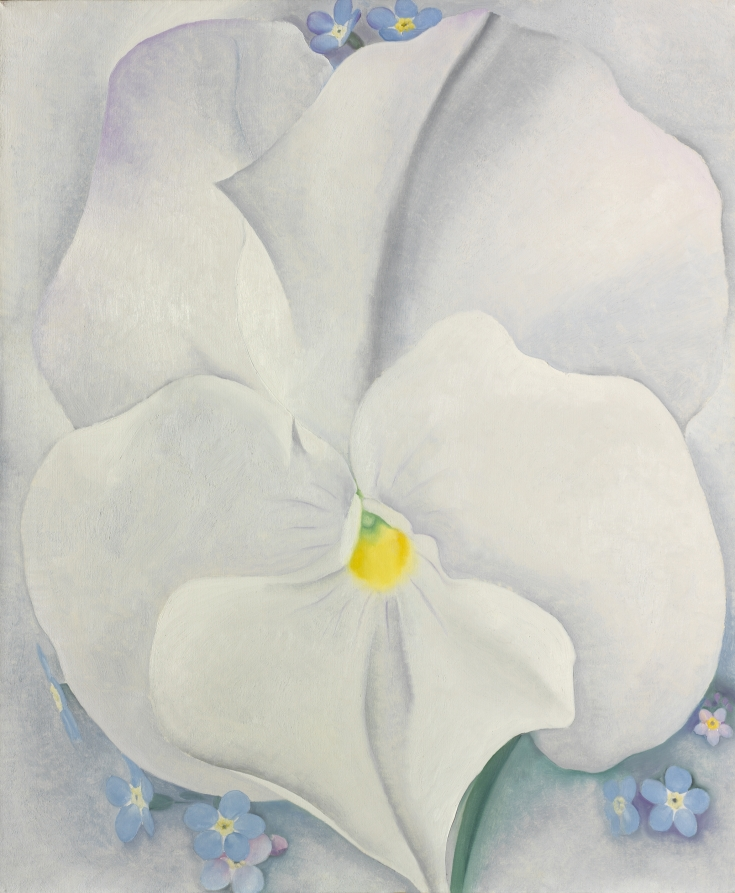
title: White Pansy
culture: America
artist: Georgia O'Keeffe (American, 1887–1986)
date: 1927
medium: oil on canvas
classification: Painting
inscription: Stretcher: "G [in circle] O'Keeffe" (GO, graphite) Backing: 1. OK * (graphite) [twice] 2. "White Pansy / 1927 / by Georgia O'Keeffe" [in oval] (AS, black crayon) 3. "Georgia O'Keeffe / 1927" (AS, graphite)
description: Among O'Keeffe's most admired works are her close-up images of flowers whose compositions border on abstraction. In this example, a large image of a white pansy is juxtaposed against much smaller blossoms of light blue forget-me-nots.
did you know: O'Keeffe displayed this painting above her living room couch before bequeathing it to the museum.